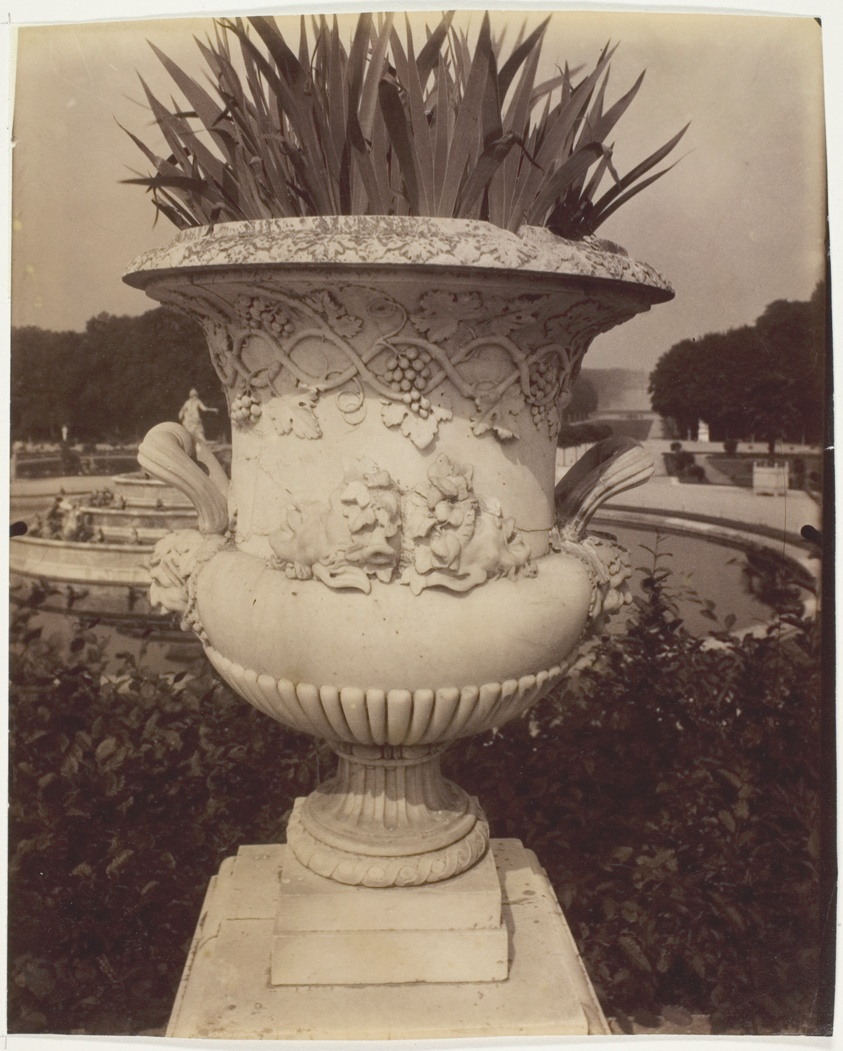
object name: Photograph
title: Versailles, Vase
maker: Jean-Eugène-Auguste Atget (French, 1857–1927)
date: 1905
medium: Albumen print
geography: France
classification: albumen silver print; photographic process; photography; photograph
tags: Collected by Hugh Edwards